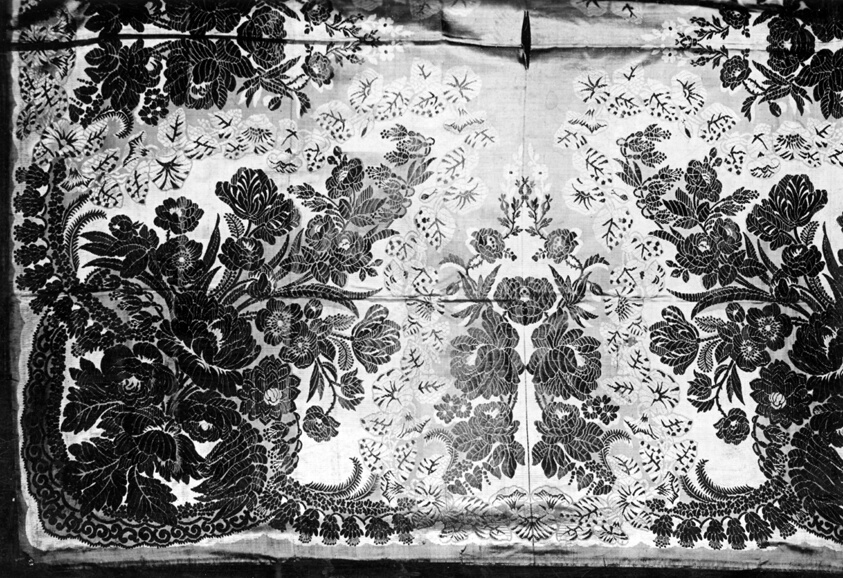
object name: Costume and Accessories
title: Shawl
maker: England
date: c. 1860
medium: Silk, compound weave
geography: England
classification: textile; weaving; costume; dress (garment); clothing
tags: fashion